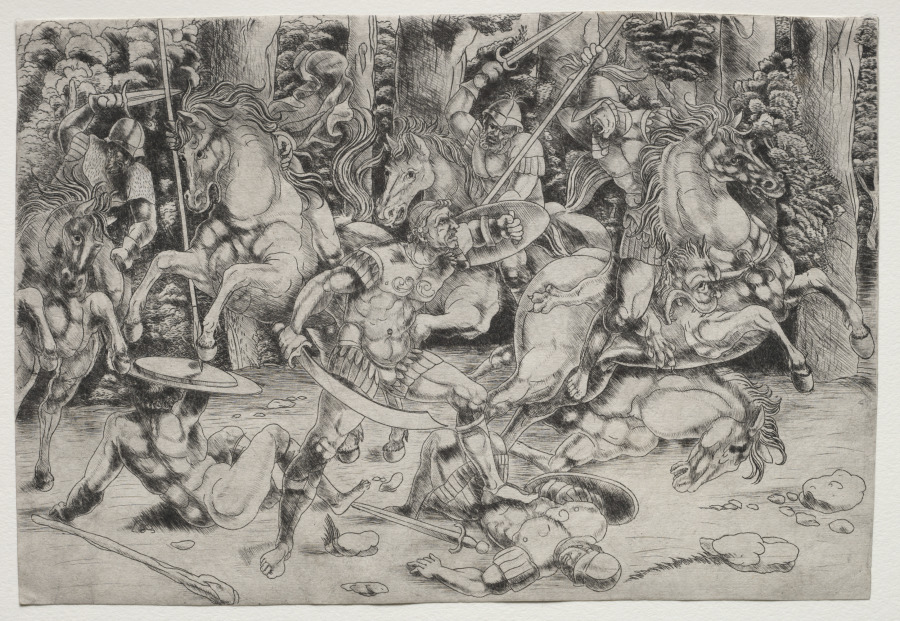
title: Battle in a Wood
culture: Italy, 16th century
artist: Master of the Year 1515 (Italian)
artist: and/or Agostino Busti (Italian, 1483–1548)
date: c. 1515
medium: engraving and drypoint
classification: Print